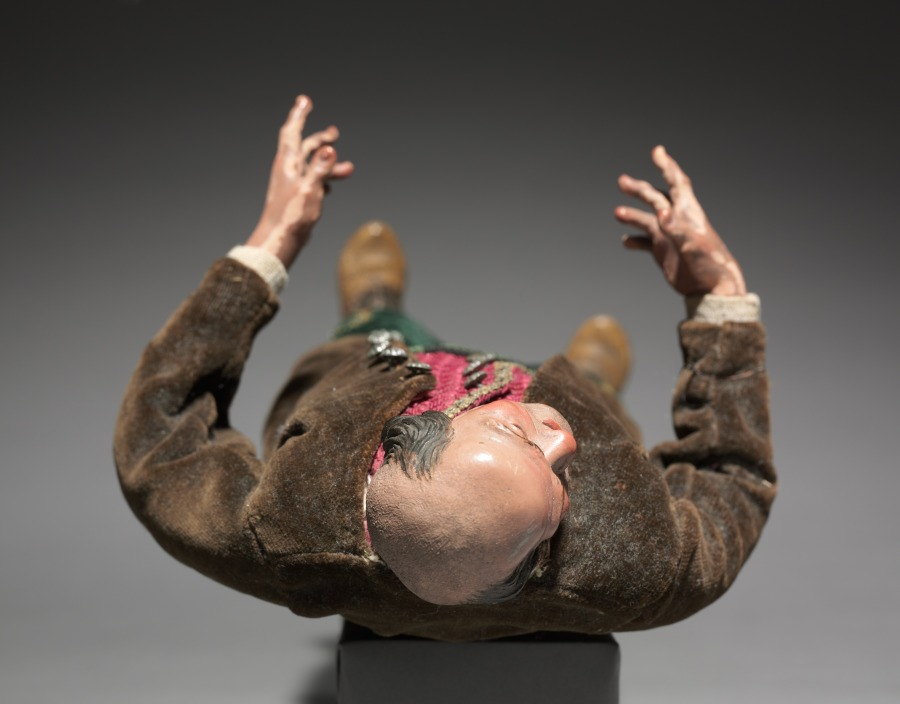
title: Figure from a Crèche: Standing Man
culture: Italy, Naples, late 18th-early 19th century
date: 1780–1830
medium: painted wood and terracotta with various textiles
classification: Sculpture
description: The practice of creating scenes of the Nativity for the home dates from the early 1700s in Italy, where people began to set up doll-like figures of about a foot or less in height. The custom was particularly popular in Naples around 1800, where crèche scenes (crèche means cradle, or crib) included many figures, whose heads and hands of painted terracotta, stuffed cloth bodies, and clothing adapted from contemporary local costumes gave them an amazingly realistic character. Representations of the birth of Jesus can be traced to the first few centuries of Christianity. Both living creatures and sculptural depictions of them were used from early times. By the late middle ages it was customary to create life-size figures of wood or stone, naturalistically painted, to represent the characters who participated in the events of Jesus's early life. These sculptures were then arranged in scenes illustrating one or both of the most important of these events, the Adoration of the Shepherds and the Adoration of the Magi-the three kings from the East who came to pay homage to the Christ child. Used in churches, these large figures were especially popular in Italy, Central Europe, Spain, and Portugal.